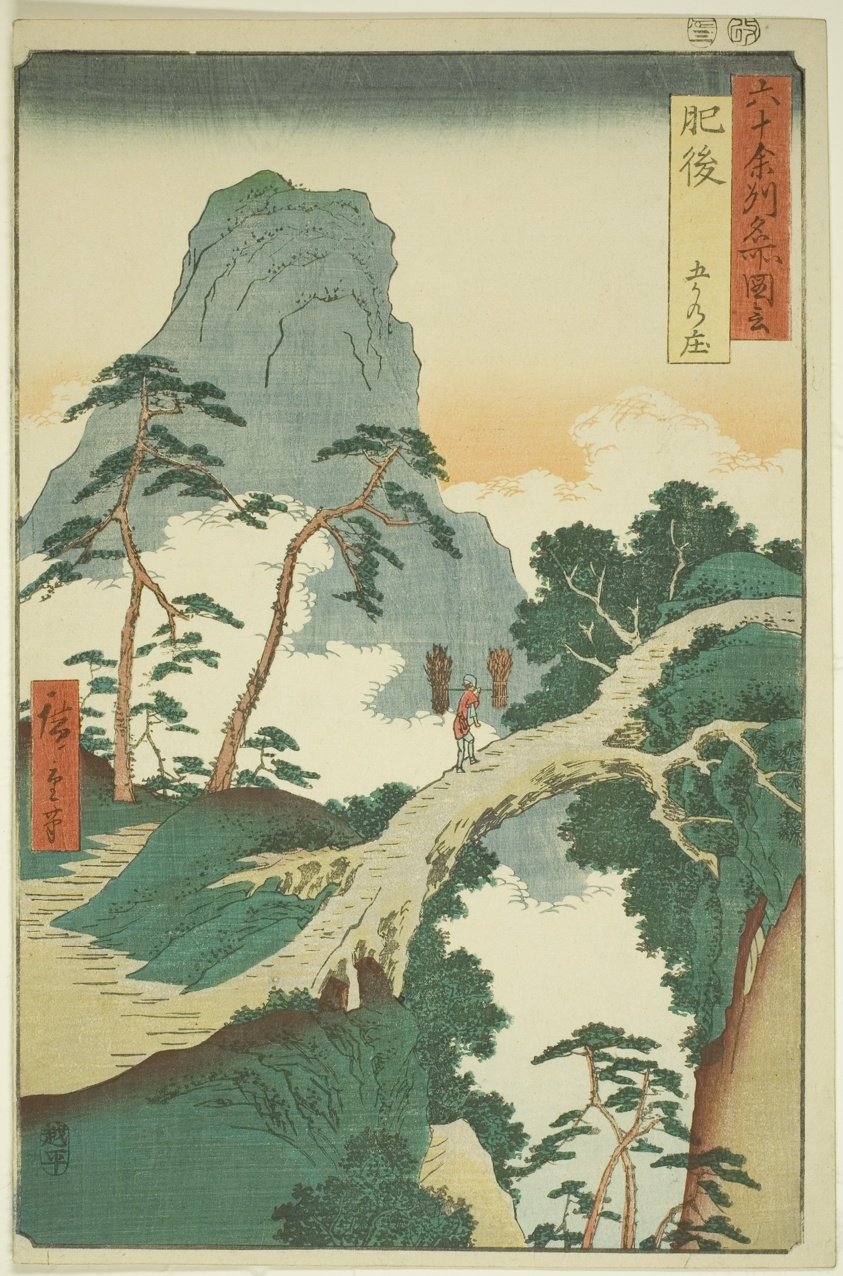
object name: Print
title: Higo Province: Gokanosho (Higo, Gokanosho), from the series "Famous Places in the Sixty-odd Provinces (Rokujuyoshu meisho zue)"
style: Japanese (culture or style)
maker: Utagawa Hiroshige 歌川 広重; Japanese, 1797-1858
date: 1856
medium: Color woodblock print; ōban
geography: Japan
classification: woodblock print; print; asian art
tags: landscapes